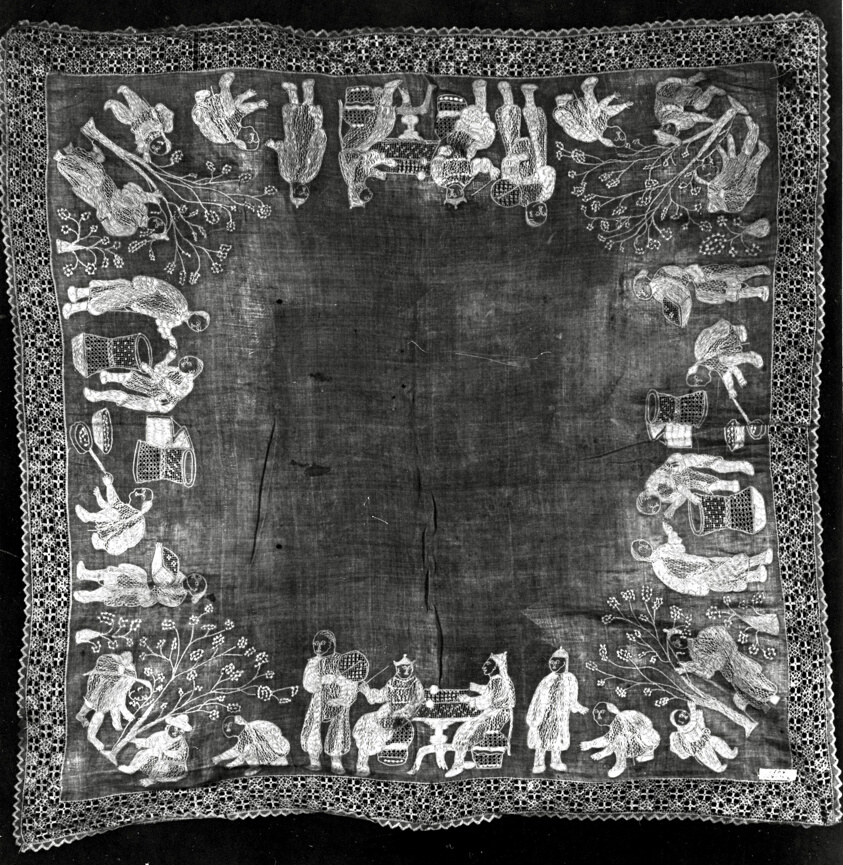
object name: Textile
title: Handkerchief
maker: Philippines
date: 19th century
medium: White drawnwork on pineapple cloth; embroidered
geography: Philippines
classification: textile; costume accessory